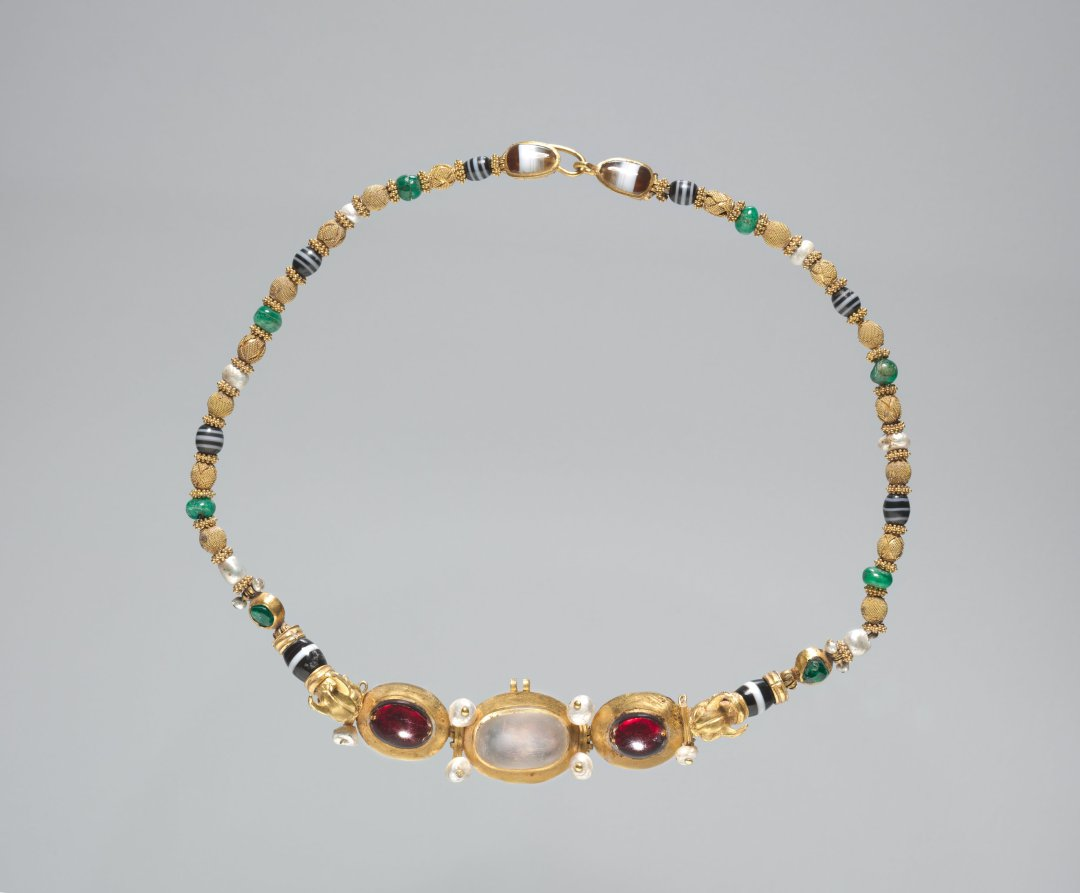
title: Necklace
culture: Greece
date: 100s BCE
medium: gold, moonstone, garnet, emerald, cornelian, baroque pearl, and banded agate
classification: Jewelry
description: Alternating semiprecious stones and granulated gold beads come together to form this magnificent necklace, capped with a gold clasp framed by banded agate cabochons. The pendant portion of this necklace is centered around a large translucent moonstone in a gold setting, framed by smaller garnet ovals, also set in gold. Two tiny gold lynx heads clasp the garnet settings in their mouths. Small baroque (nonspherical) pearls dangle from these central settings. The combination of multiple precious and semiprecious stones with complex goldwork suggests that this necklace was originally made in one of the Greek kingdoms in the Black Sea region.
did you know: The lynx heads on this necklace may reference the mythical King Lyncus of Scythia.